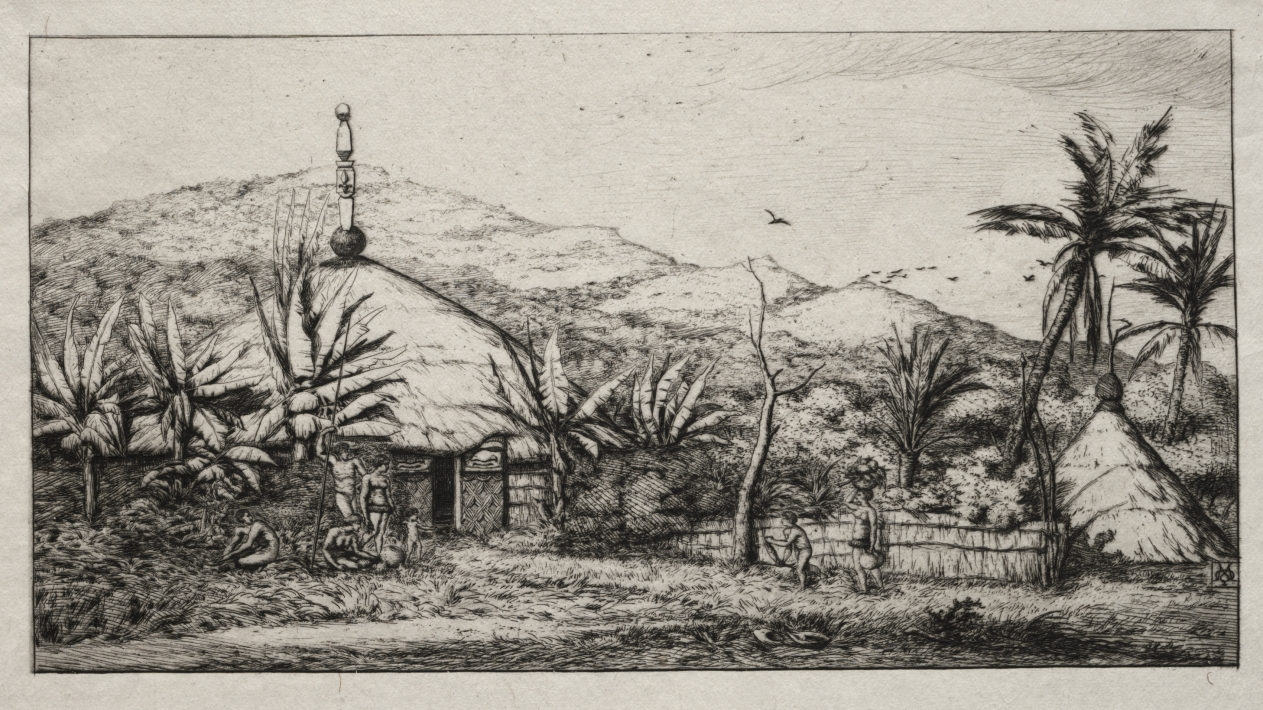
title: New Caledonia: Large Native Hut on the Road from Balade to Puebo, 1845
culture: France, 19th century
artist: Charles Meryon (French, 1821–1868)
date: 1863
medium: etching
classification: Print